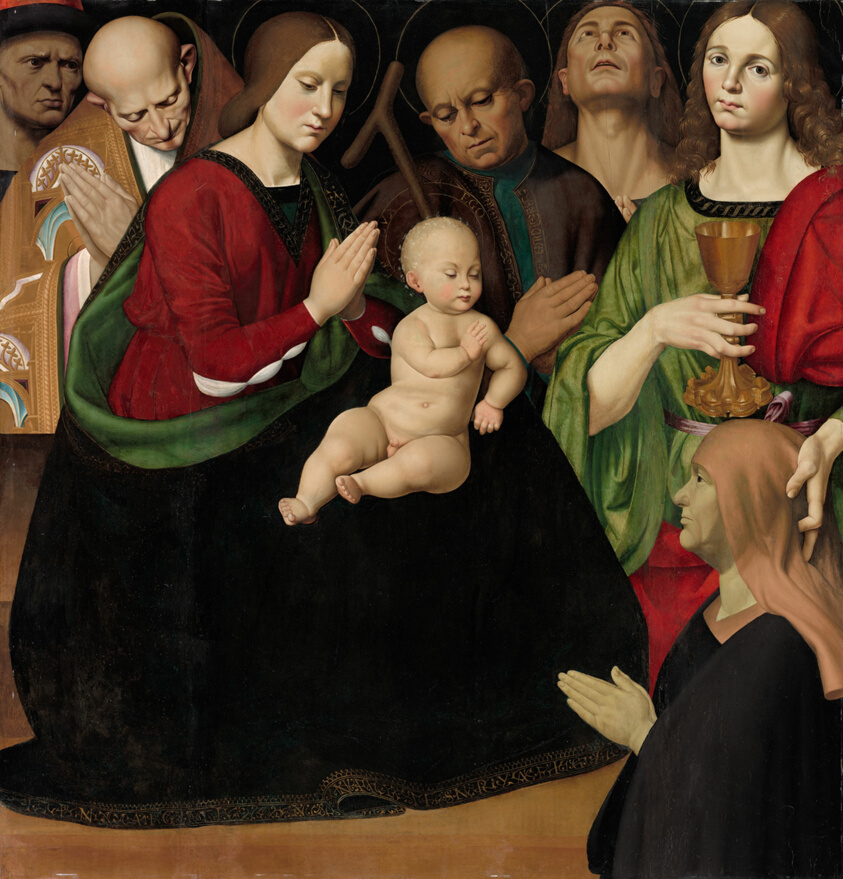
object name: Painting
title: The Holy Family with Four Saints and a Female Donor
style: 16th Century, sixteenth century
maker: Antonio Rimpatta (Italian, documented from 1509–died 1531/32)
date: c. 1510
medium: Oil on panel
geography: Italy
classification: oil on panel; oil paintings (visual works); Italian; painting; european painting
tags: holy family, woman with children, woman, Virgin Mary, Virgin and child/Madonna and child, saints, religious scenes, religious figures, religious, religion, red (color), prayer, mother, Jesus, green (color), Devotion, Christianity, Christian subjects, chalice, babies